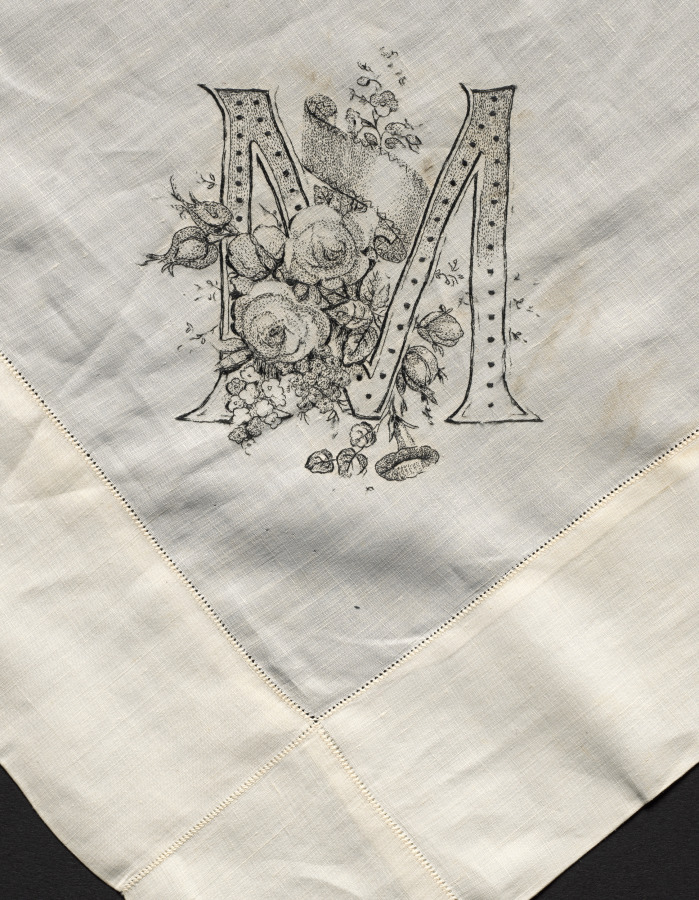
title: Embroidered Handkerchief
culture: Spain, Teneriffe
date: 1800s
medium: linen: embroidery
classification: Embroidery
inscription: embroidered in black in one corner, a large letter "M."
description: This handkerchief is monogrammed in black in one corner with the letter M.